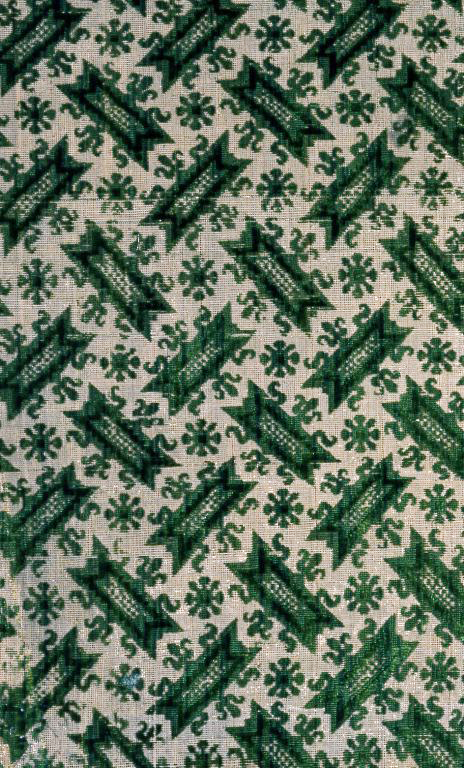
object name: Textile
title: Panel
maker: Italy, probably Florence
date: 1575/1600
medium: Silk, plain weave with gilt-metal-strip facing wefts and supplementary pile warps forming cut voided velvet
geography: Florence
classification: textile; weaving - velvet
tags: foliage